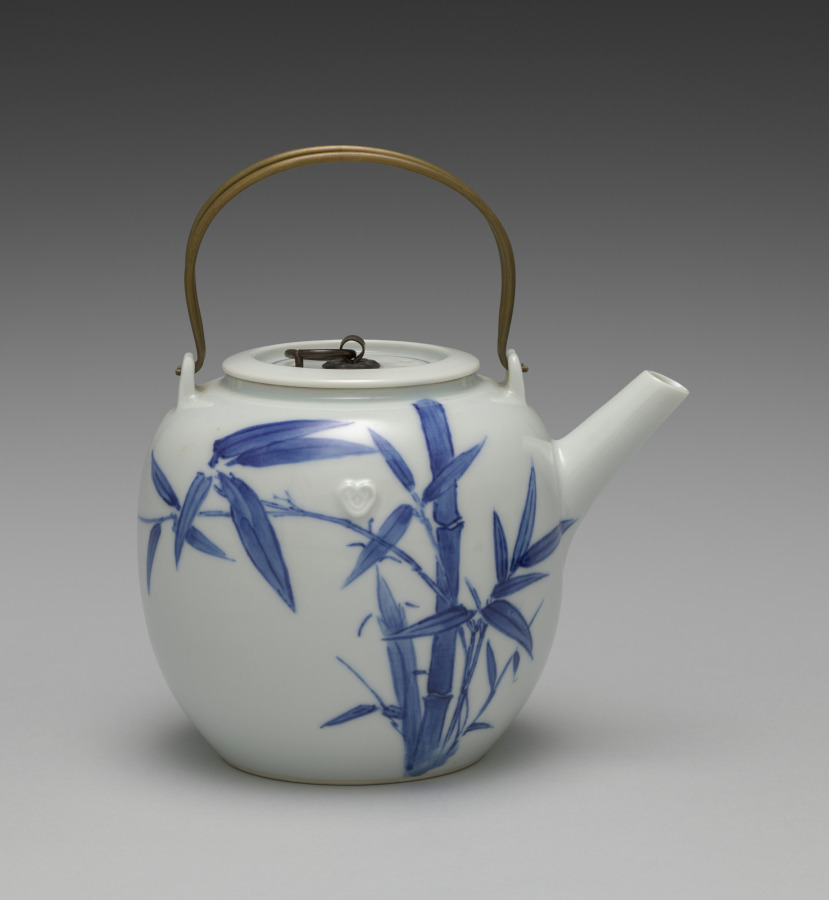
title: Teapot with Bamboo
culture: Japan, Taishō period (1912–26) or Shōwa period (1926–89)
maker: Seifū Yohei IV (Japanese, 1872–1951)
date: 1914–46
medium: Porcelain with underglaze blue, molded design and metal handles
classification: Ceramic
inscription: 清風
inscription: 清風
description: This teapot has a well-balanced design of bamboo in underglaze blue and nyoi staff-head motifs applied to both sides at the shoulder.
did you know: There is a seal on the base of the teapot.